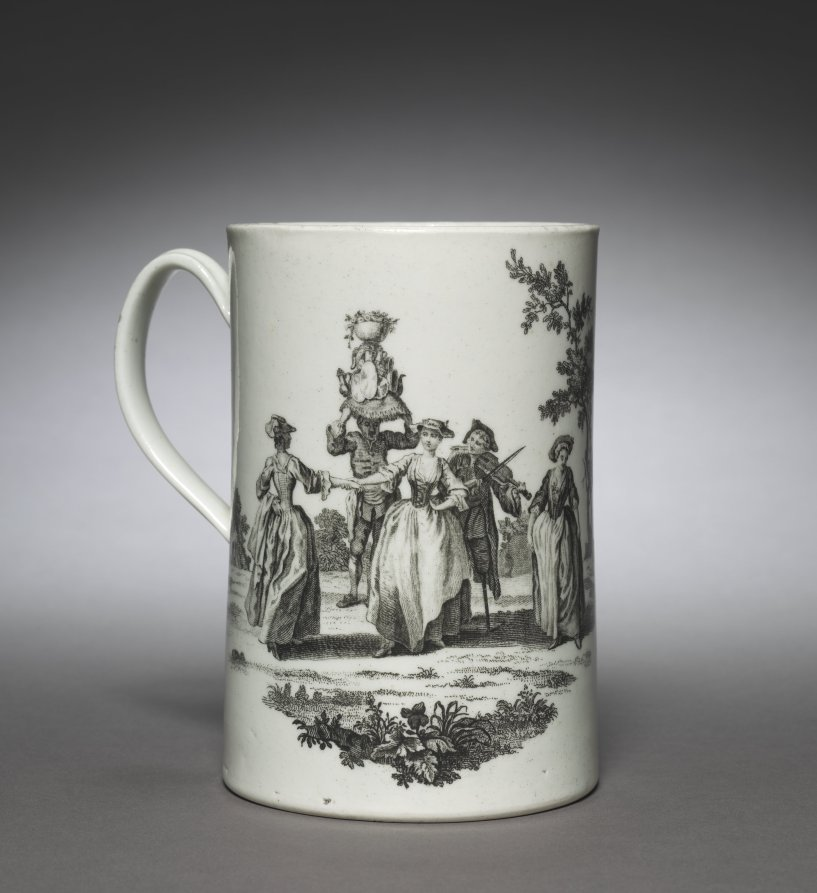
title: Cann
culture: England, 18th century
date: c. 1770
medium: ceramic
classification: Ceramic